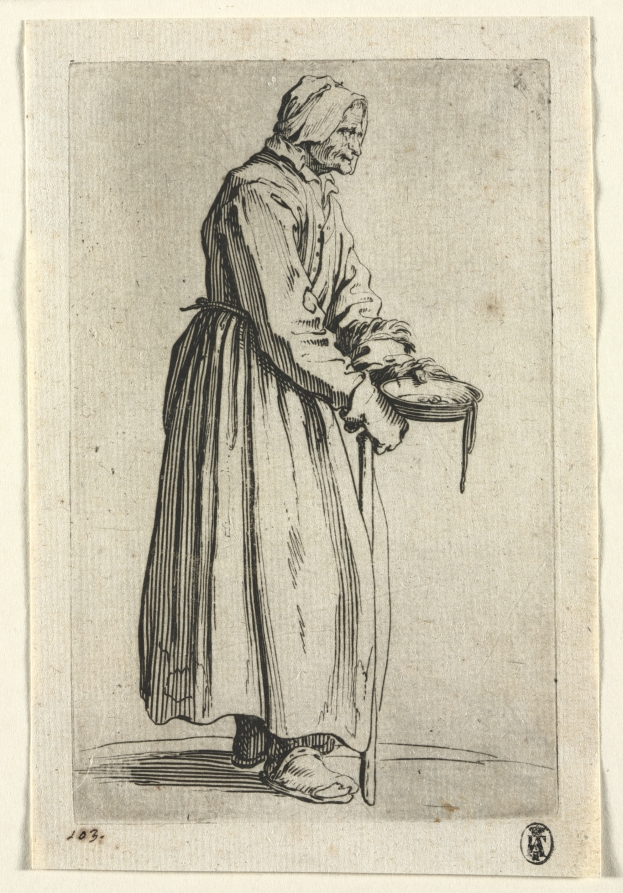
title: The Beggars: Beggar Woman with Her Alms Bowl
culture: France, 17th century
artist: Jacques Callot (French, 1592–1635)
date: c. 1623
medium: etching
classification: Print